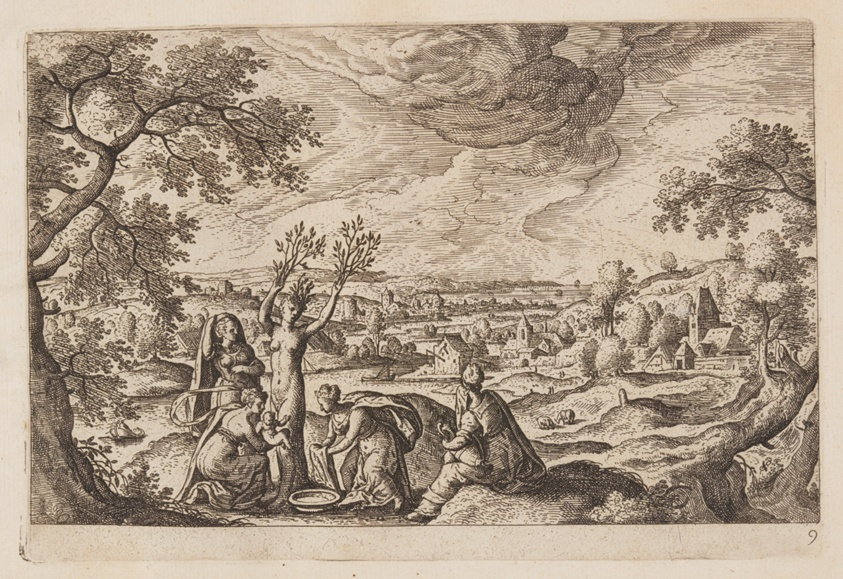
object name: Print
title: Plate 9, from Landscapes with Scenes from the Old and New Testament and Ovid’s Metamorphoses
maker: Hans Bol (Flemish, 1534–1593); published by Philip Galle (Flemish, 1537–1612)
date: 1574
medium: Etching on ivory laid paper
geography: Flanders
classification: print; paper; prints and drawing; etching